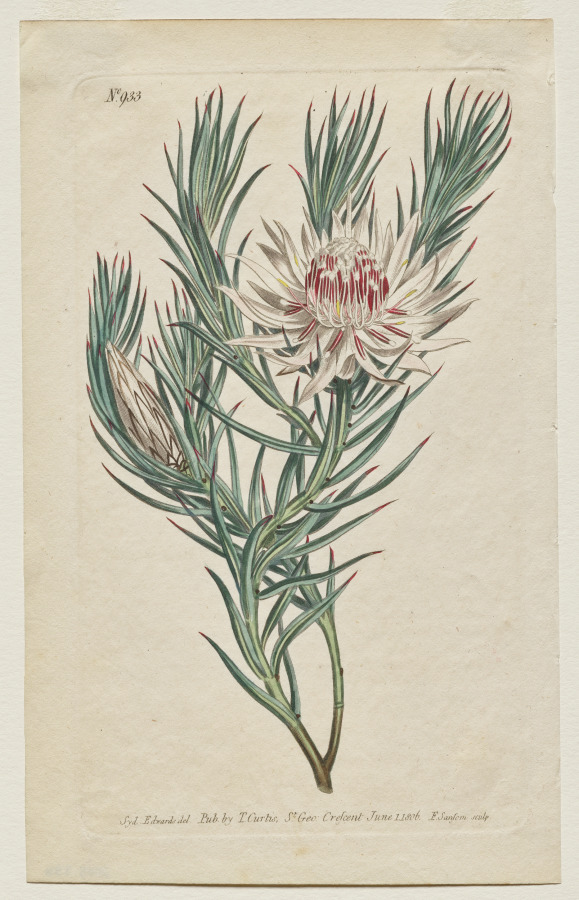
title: The Botanical Magazine or Flower Garden Displayed: Plate 933, Protea mucronifolia. Dagger-Leaved Protea. [Protea odorata]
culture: England, 19th century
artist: Francis Sansom (British, 1815)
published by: Thomas Curtis (British, 1846–1920)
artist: after Sydenham Edwards (British, 1768–1819)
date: 1806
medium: engraving with hand coloring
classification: Print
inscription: upper right corner, engraved: No. 933 lower margin, engraved: Syd. Edwards del. Pub. By T. Curtis, St. Geo. Crescent June 1, 1806 F. Sansom sculp.